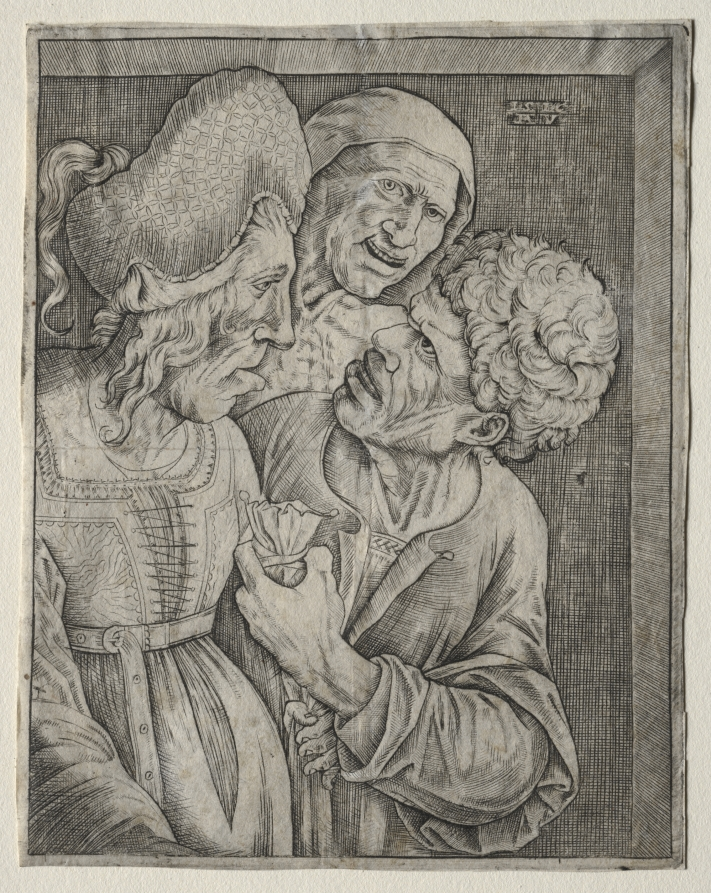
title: The Rich Old Woman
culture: Italy, 16th century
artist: Agostino Veneziano (Italian, 1490–1540)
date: early 1500s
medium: engraving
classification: Print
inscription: In pencil on verso: "p. 183 [illegible inscription] Agostino Veneziano/p.183/[illegible inscription]/C.G[illegible] circled in black ink